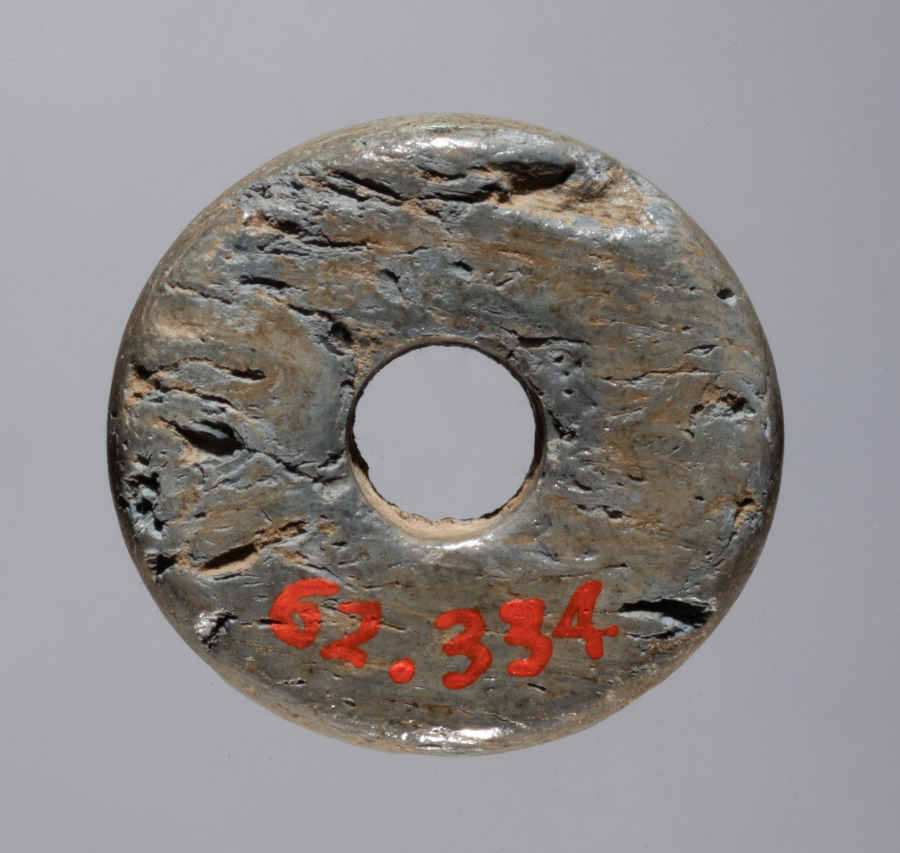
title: Spindle Whorl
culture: Iran, early Islamic period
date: 700s - 900s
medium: bone, incised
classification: Spindle Whorl